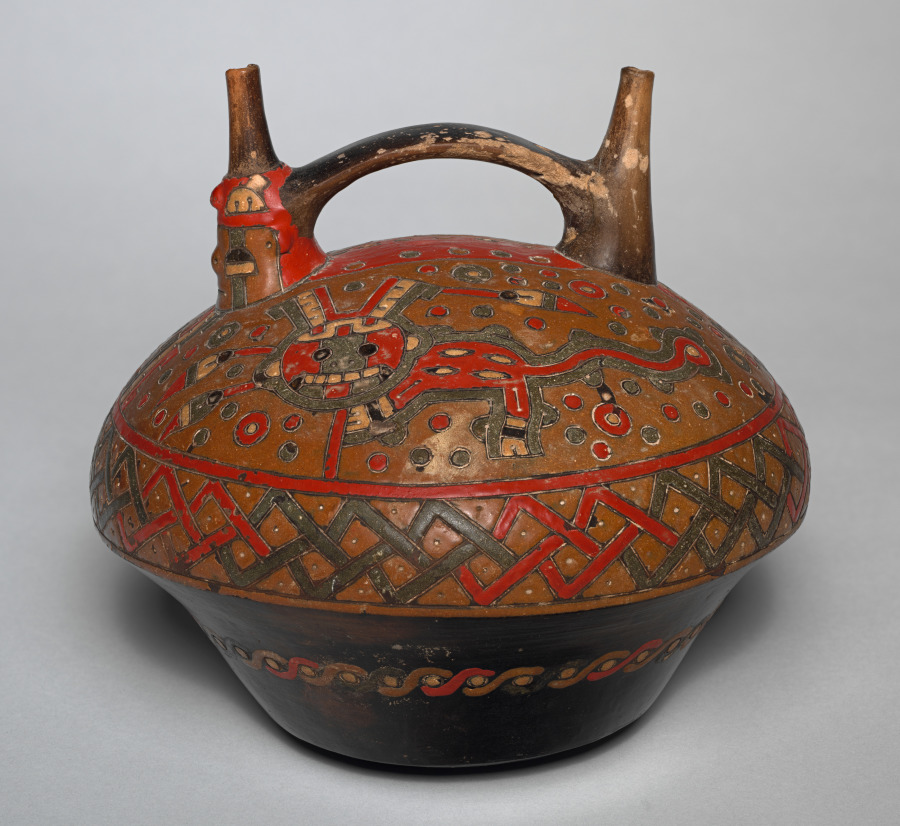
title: Double-spouted Vessel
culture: Andes, south coast, Paracas people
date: 750–1 BCE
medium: Ceramic, resin-based paint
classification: Ceramic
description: The Paracas style, the earliest of Peru’s south coast, focuses on geometric abstraction and polychromy, the latter achieved in ceramics with resin-based paints applied after the vessel was fired. This example is embellished with two monkey- or feline-like creatures whose curvilinearity indicates the vessel was made in the late stages of the Paracas sequence.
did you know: A face with upturned eyes on one spout gives this vessel a specific orientation.